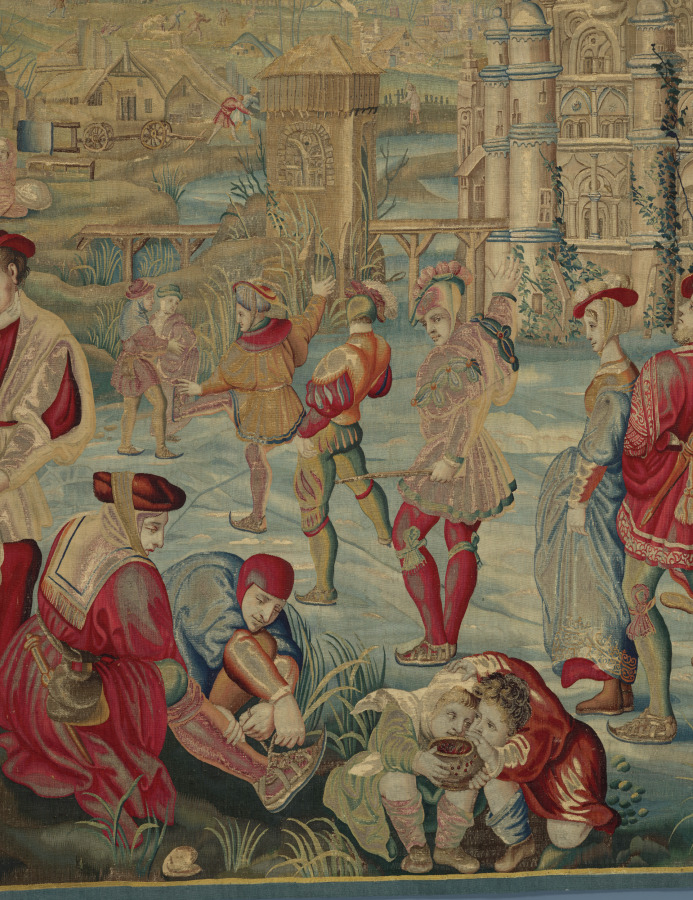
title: Winter: Skating Scene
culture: France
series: Four Seasons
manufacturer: possibly by Gobelins Manufactory (France, Paris, est. 1662)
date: designed c. 1535, woven mid- to late 1600s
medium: Wool, silk, and gold filé: tapestry weave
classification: Tapestry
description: People of all classes and ages enjoyed ice skating, a winter pastime popularized in the Netherlands. Here, some couples are already skating and slipping on the ice, while others tie on their skates or huddle around braziers (portable coal heaters) to keep warm. One affectionate couple in the foreground hold hands as they walk. A castle on the far edge of the frozen lake occupies the background. In the left distance, several small figures holding ladders and long hooks run toward a building that has caught on fire, a frequent occurrence in the winter when wooden houses were heated by fireplaces.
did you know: If you look closely you can see that the top edge of this scene is missing; look at the top of the castle on the right or the forest fire on the left.